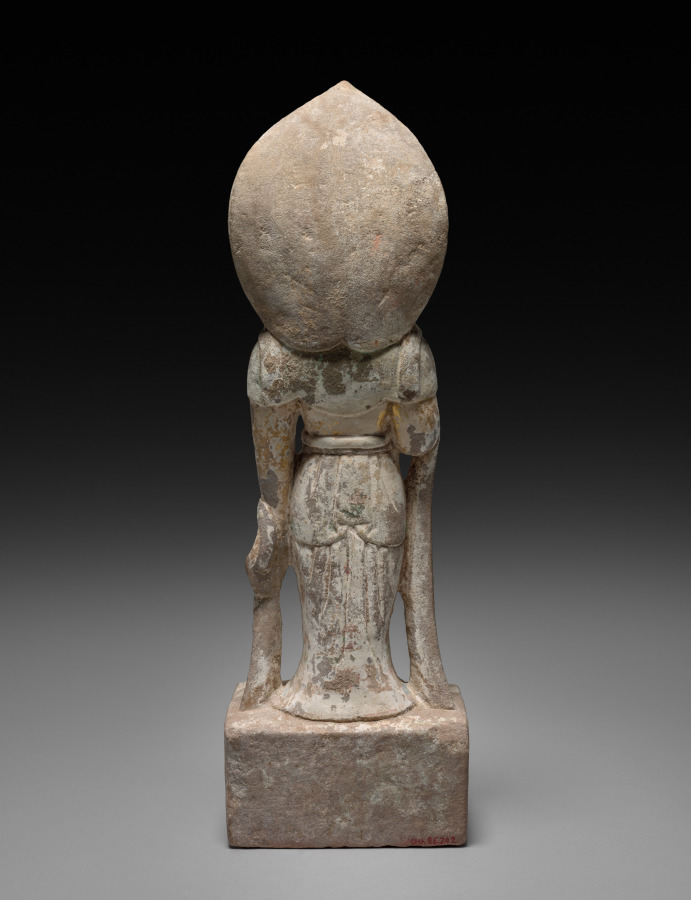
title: Bodhisattva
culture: China, Sui dynasty (581-618) - Tang dynasty (618-907)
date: late 500s–early 600s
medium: stone with polychromy and gilding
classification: Sculpture